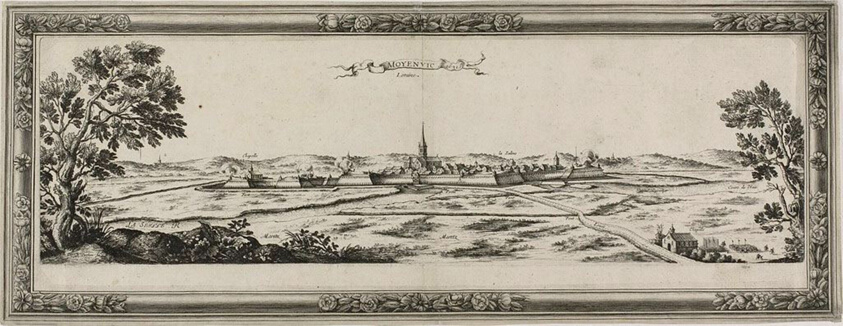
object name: Print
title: Moyenvic, Lorraine, 1631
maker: Nicolas Cochin (French, 1610-1686)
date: c. 1635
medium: Etching on ivory laid paper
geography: France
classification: etching; print; prints and drawing